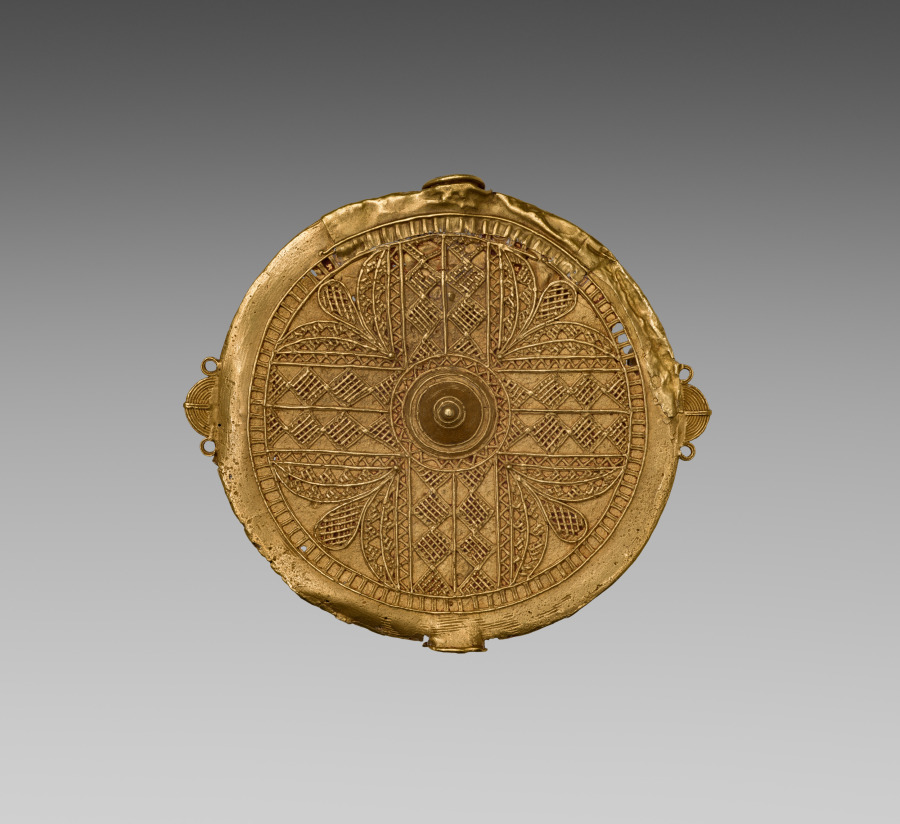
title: Disk Pendant (akrafokɔnmu)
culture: Africa, West Africa, Ghana, Asante Empire/ Kingdom, member of the goldsmiths’ guild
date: 1800s, before 1871; pin added later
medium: Gold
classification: Jewelry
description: Gold discs dangling on the chests of Akan state officials and elites showed their rank and duties. Worn by these akrafo (“soul people”) since the 1800s, they are often linked to kradware, officials who represent and purify (“wash”) the king’s soul. To make them, goldsmiths cast or flattened gold. Muslim North African gold coins likely inspired their form and material, while concentric water rings influenced their composition. This small disc is a typical pre-colonial example. Gold ornament making ceased until 1924; court officials now wear large discs.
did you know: An 1886 letter indicates that the English doctor Harry T. Reilly received this disk as a gift from three Asante chiefs for providing them with medical care while they were imprisoned in Cape Coast Castle in the aftermath of the Second Anglo-Ashanti war (1863-64).